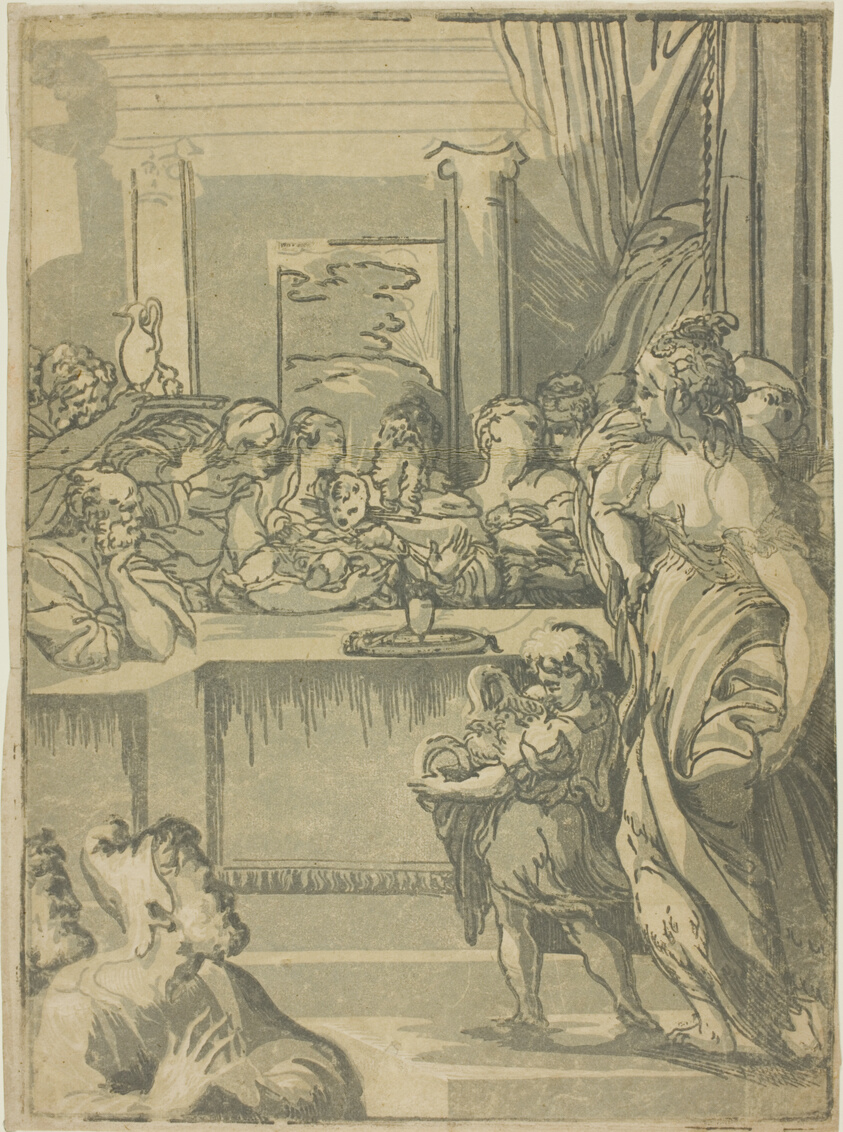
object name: Print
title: The Presentation in the Temple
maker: Niccolò Vicentino (Italian, 1510-1566); after Parmigianino (Italian, 1503-1540)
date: 1540/50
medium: Chiaroscuro woodcut from 4 blocks, printed in tan and gray, on cream laid paper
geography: Italy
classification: woodcut; paper; chiaroscuro woodcut; print; prints and drawing